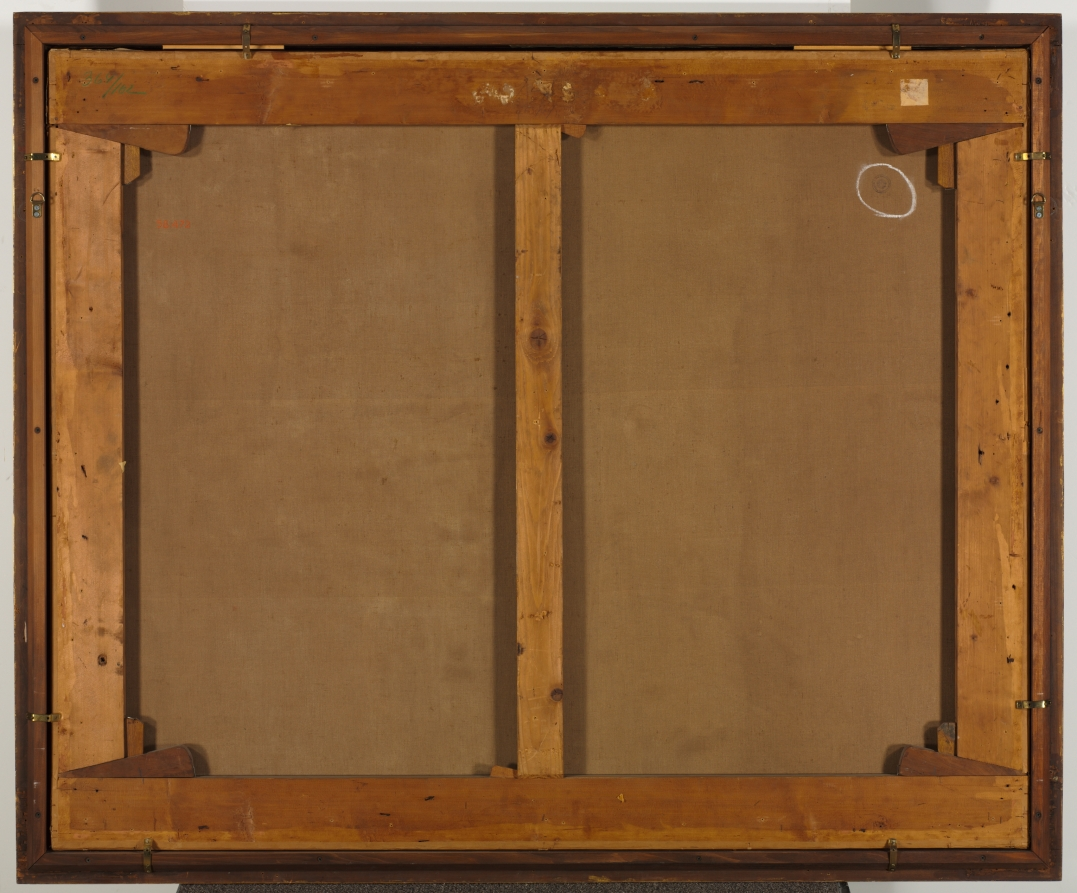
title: Ruins in a Rocky Landscape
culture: Italy, 17th century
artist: Salvator Rosa (Italian, 1615–1673)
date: c. 1640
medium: oil on canvas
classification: Painting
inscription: Signed lower right: "SR [monogram]"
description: In 1635, Rosa left his native Naples for Rome, the undisputed art center of the 17th century, where a new type of landscape painting was emerging, distinguished by the effects of light and atmosphere. Rosa’s fame grew quickly as a painter of landscapes that conjured the beauty and fertility of the Bay of Naples. Ruins in a Rocky Landscape incorporates classical ruins, iridescent reflections of light, and a pastoral tone evoked by the idling shepherds, exemplifying the work that earned Rosa his early fame. The dark, dramatic rocks that rise along the left foreshadow the wildness that Rosa would cultivate in his later sublime landscapes.